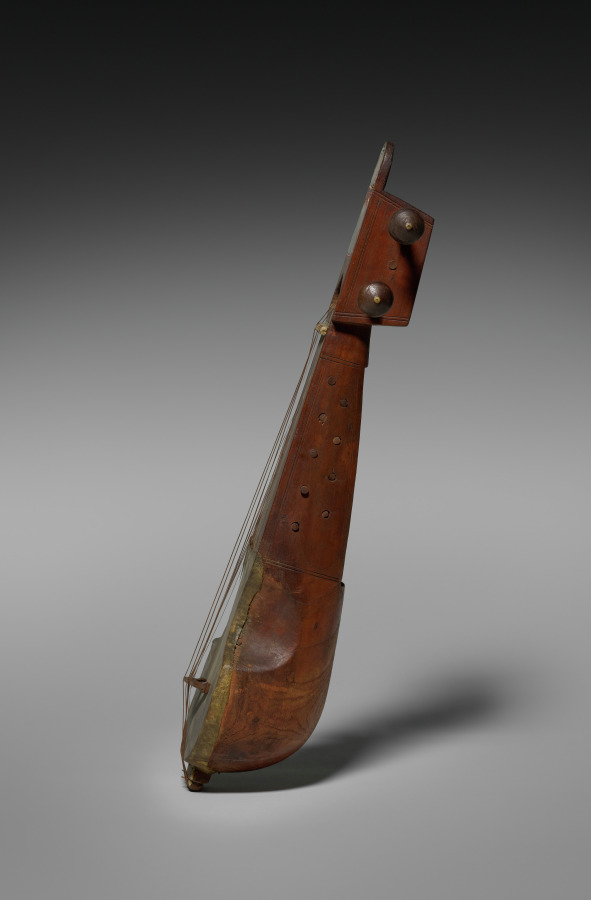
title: Sarangi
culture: India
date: 1800s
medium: Wood with traces of pigment, parchment, bone or ivory, mirrored glass, and copper strings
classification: Musical Instrument